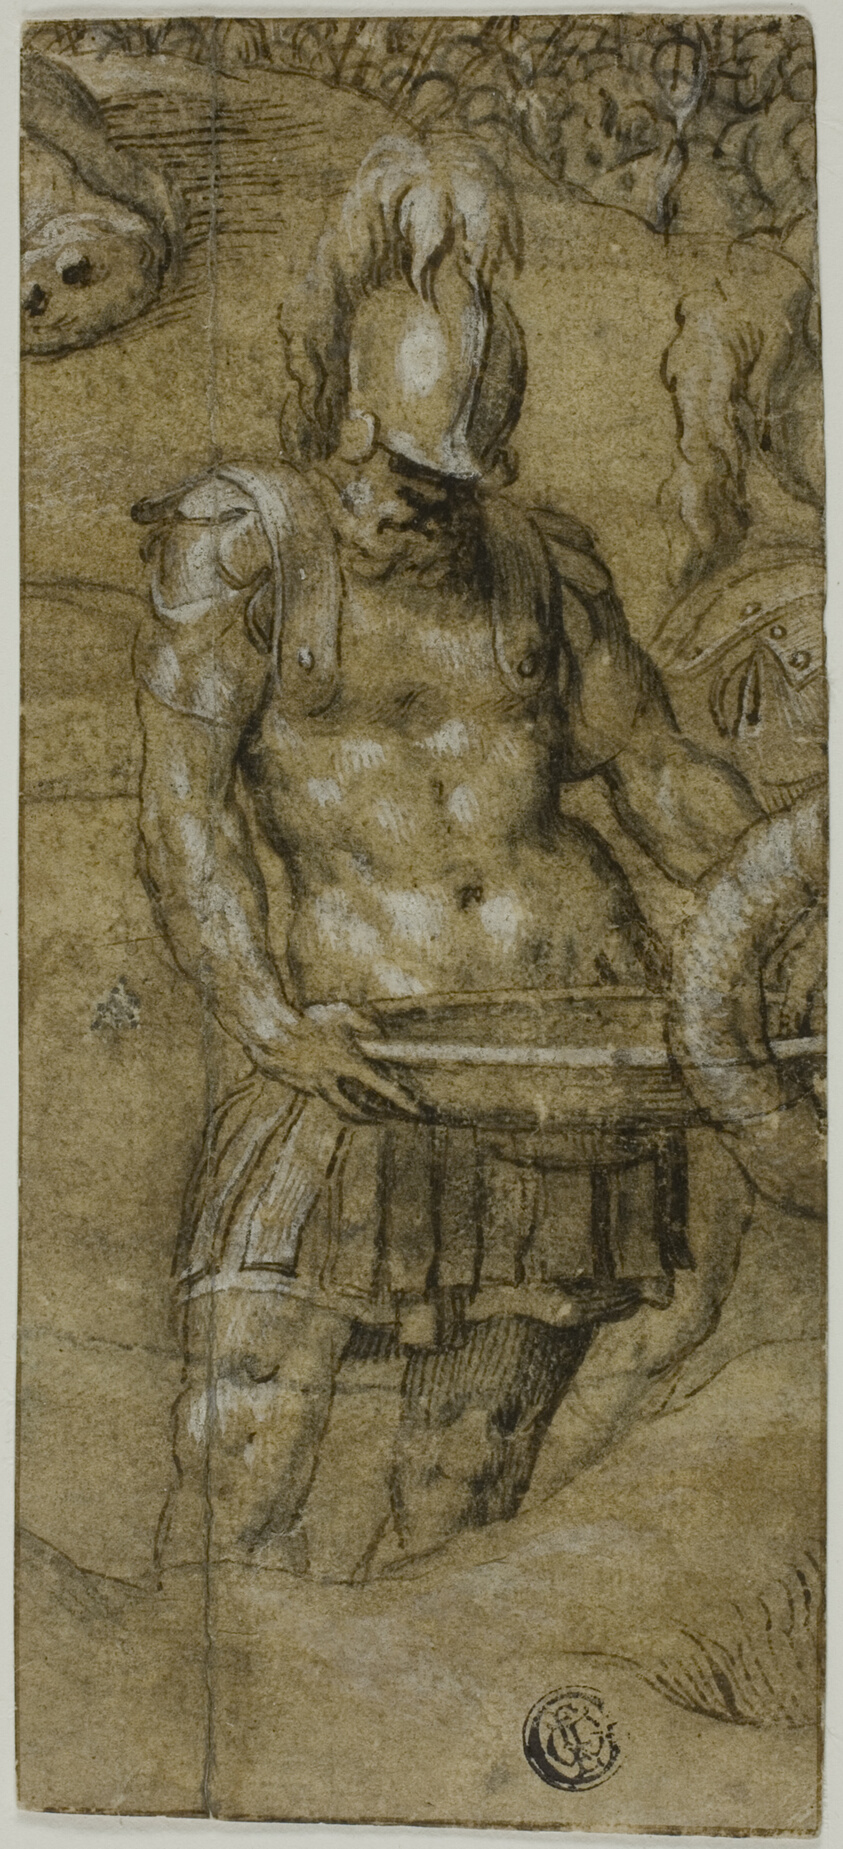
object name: Drawing and Watercolor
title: Roman Soldier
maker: Paolo Farinati (Italian, 1524-1606)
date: c. 1545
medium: Pen and brown ink with brush and brown wash, over black chalk, heightened with white gouache, on tan laid paper, laid down on light-weight wove paper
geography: Italy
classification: ink with wash; drawings (visual works); prints and drawing